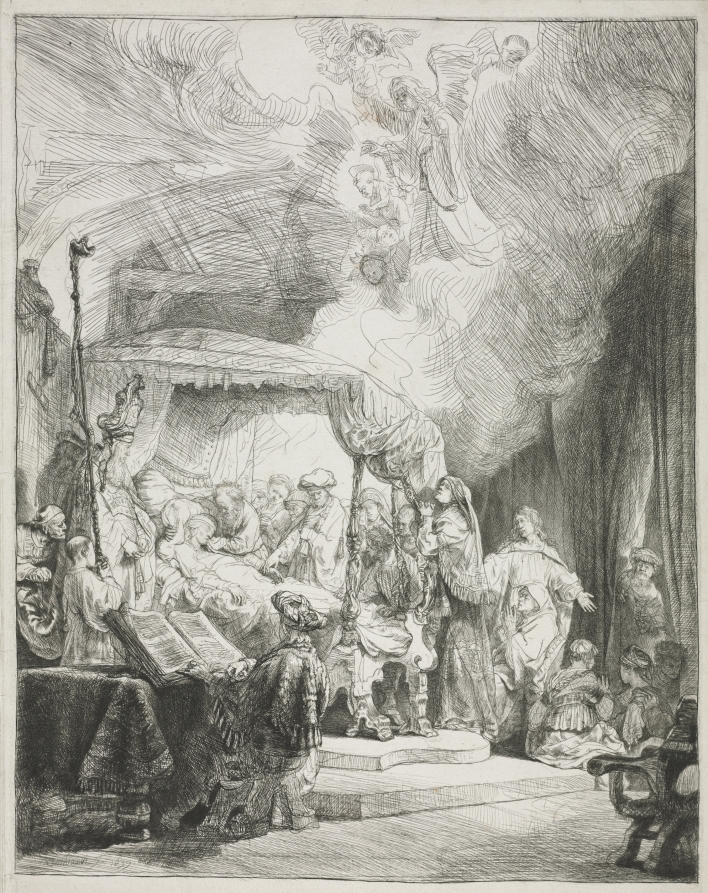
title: Death of the Virgin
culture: Netherlands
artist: Rembrandt van Rijn (Dutch, 1606–1669)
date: 1639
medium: etching and drypoint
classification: Print